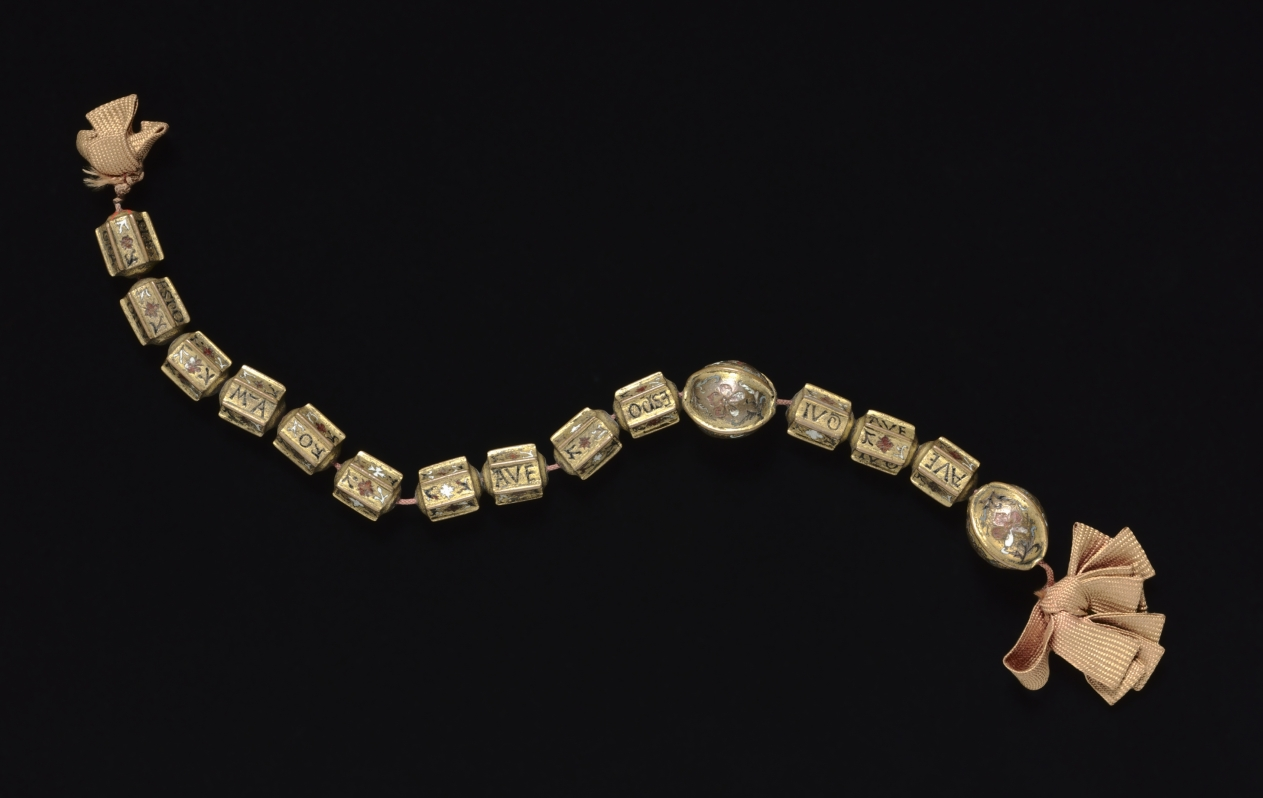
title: Beads from a Rosary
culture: Italy, early 16th century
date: early 1500s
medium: gilt copper with champlevé enamel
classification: Enamel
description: Rosaries were devices for counting a sequence of prayers and were the proud possessions of the elite, along with their books of hours. In paintings and miniatures they are often shown looped through the belts of their owners.